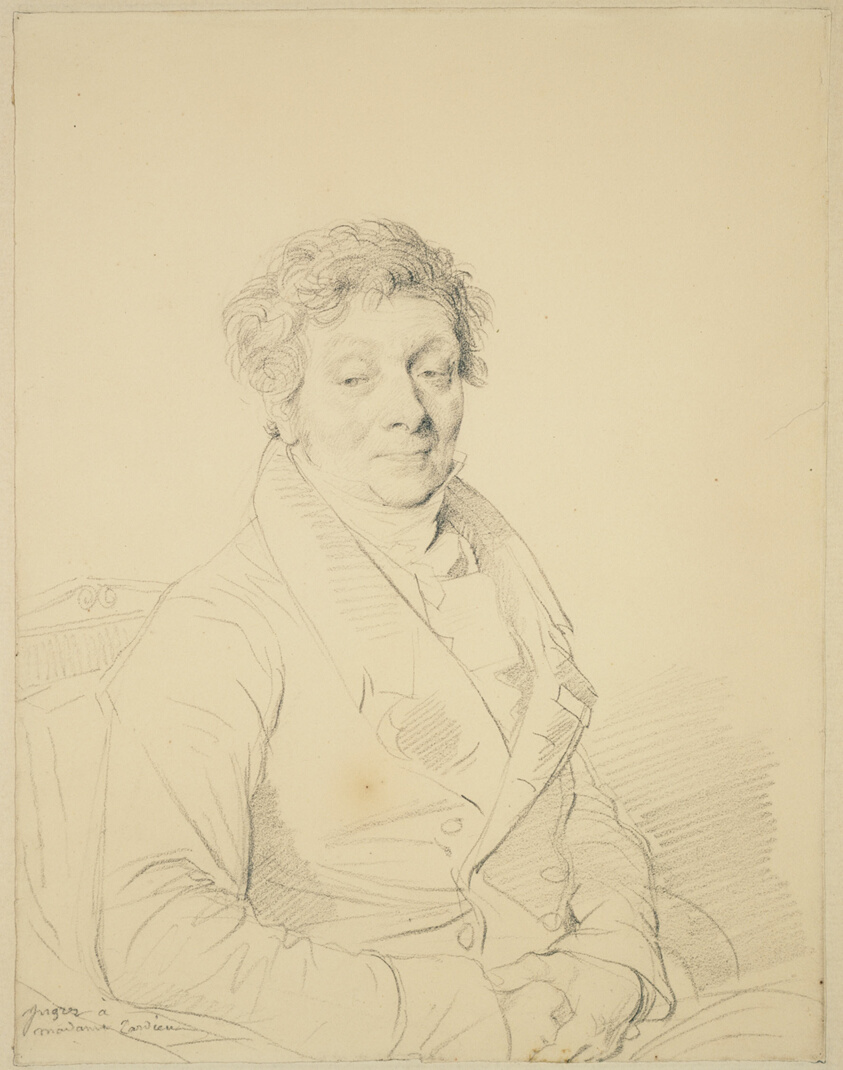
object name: Drawing and Watercolor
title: Pierre Alexandre Tardieu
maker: Jean–Auguste–Dominique Ingres; French, 1780–1867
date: c. 1825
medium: Graphite on cream wove paper, laid down on ivory laid paper, and stretched on a wooden stretcher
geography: France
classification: drawings (visual works); prints and drawing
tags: Century of Progress, world's fairs, Chicago World's Fairs